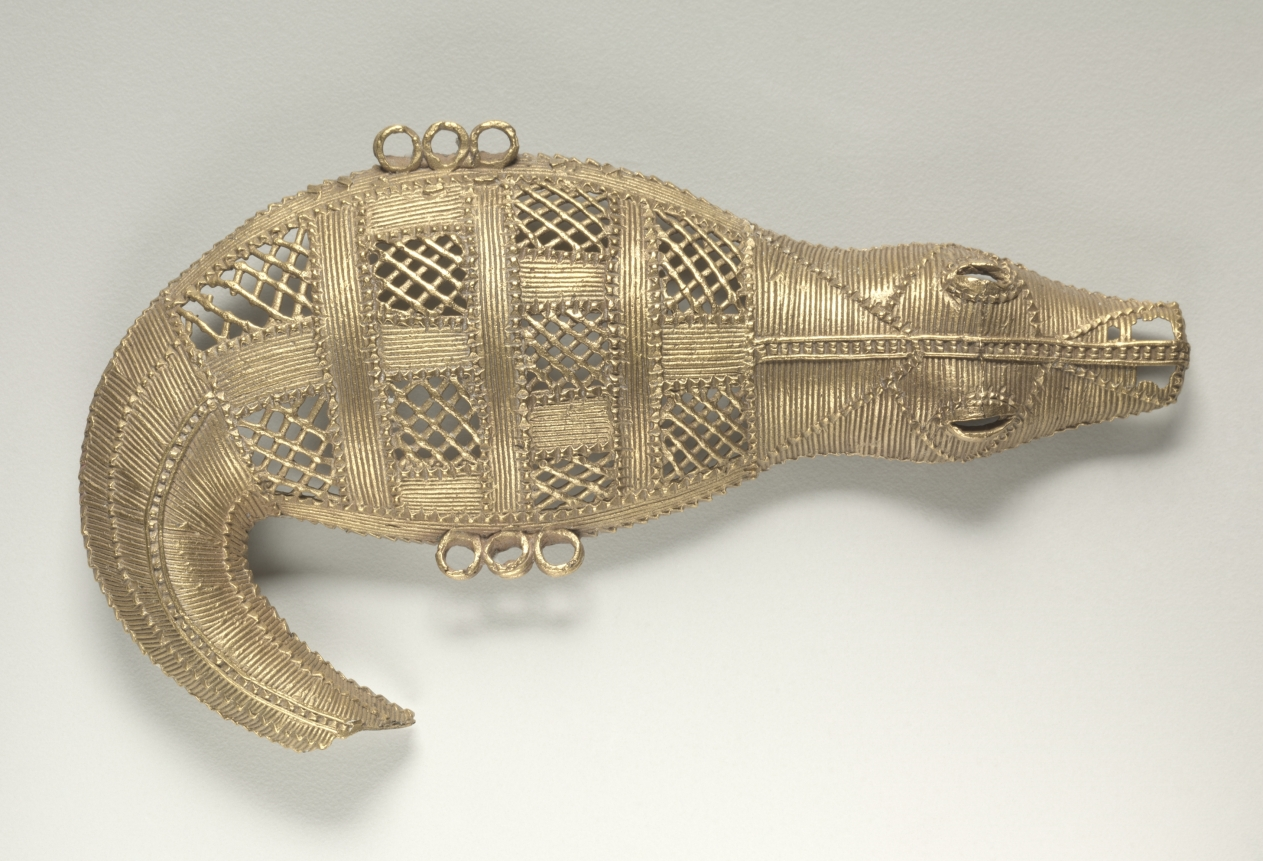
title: Pendant: Crocodile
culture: Africa, West Africa, Côte d'Ivoire, probably Baule-style goldsmith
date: 1930 or earlier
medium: Gold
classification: Jewelry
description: This pendant was cast in gold using the lost-wax method. Gold objects are the only Baule art forms associated with ancestor spirits. Pendants can have many uses. Usually hidden in pots or suitcases, gold adornments can be displayed on important occasions such as funerals. They can be laid out around the corpse before burial. A widow will wear them on a chain around her neck or attached to her hair at the ceremony signaling the end of mourning.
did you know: A goldsmith had to create superfine rolls of wax to make the texture of this piece; the wax was used to make a mold into which liquid gold was poured.